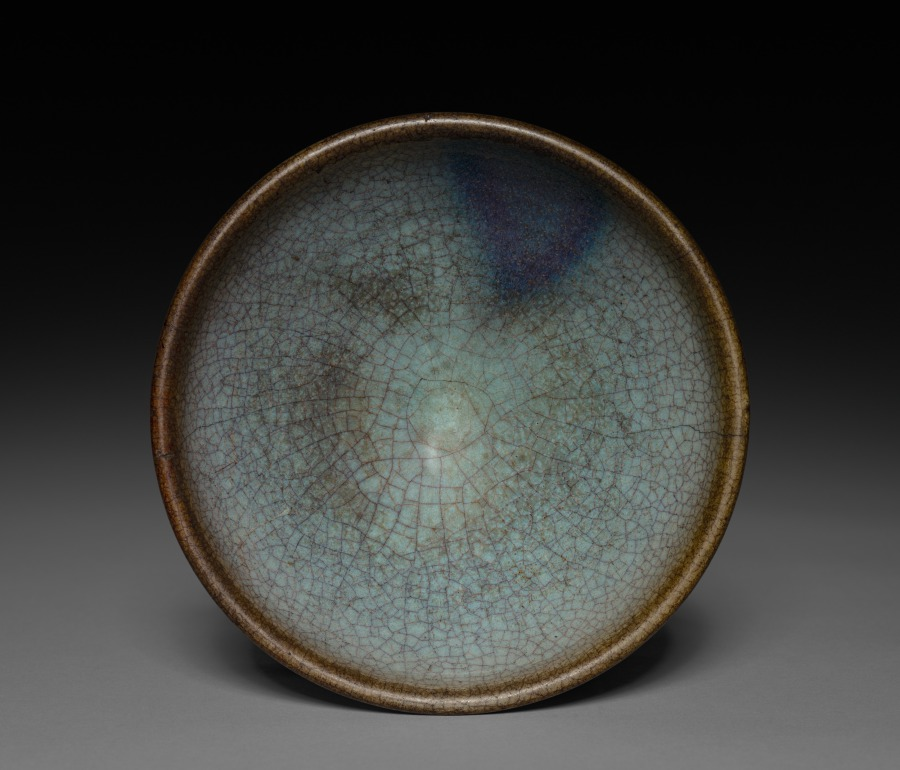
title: Bowl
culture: China, Yuan dynasty (1271-1368)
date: 1271–1368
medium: earthenware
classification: Ceramic